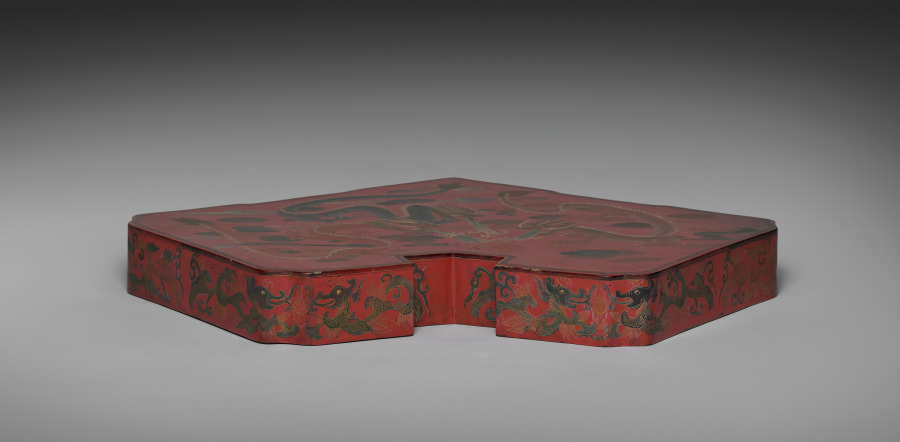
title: Lower Tier Box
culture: Japan, Edo period (1615–1868)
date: late 1700s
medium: red lacquer over a wood core, with litharge painting and engraved gold designs (Ryukyuan)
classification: Lacquer